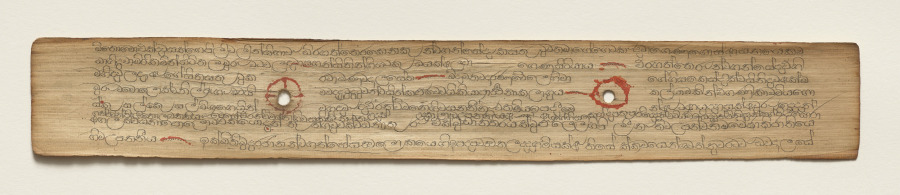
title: Leaf from a Buddhist Manuscript (verso)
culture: Sri Lanka, Singhalese, Late 17th century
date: c. 1700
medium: fiber paper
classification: Manuscript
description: Palm leaf material is still used for manuscripts in Sri Lanka. The palm leaves are prepared first by boiling them, drying them in the sun, and then rubbing them with oils. Scribes then use a metal stylus to incise the text. Then charcoal powder is wiped across the pages, filling in only the inscribed lines.